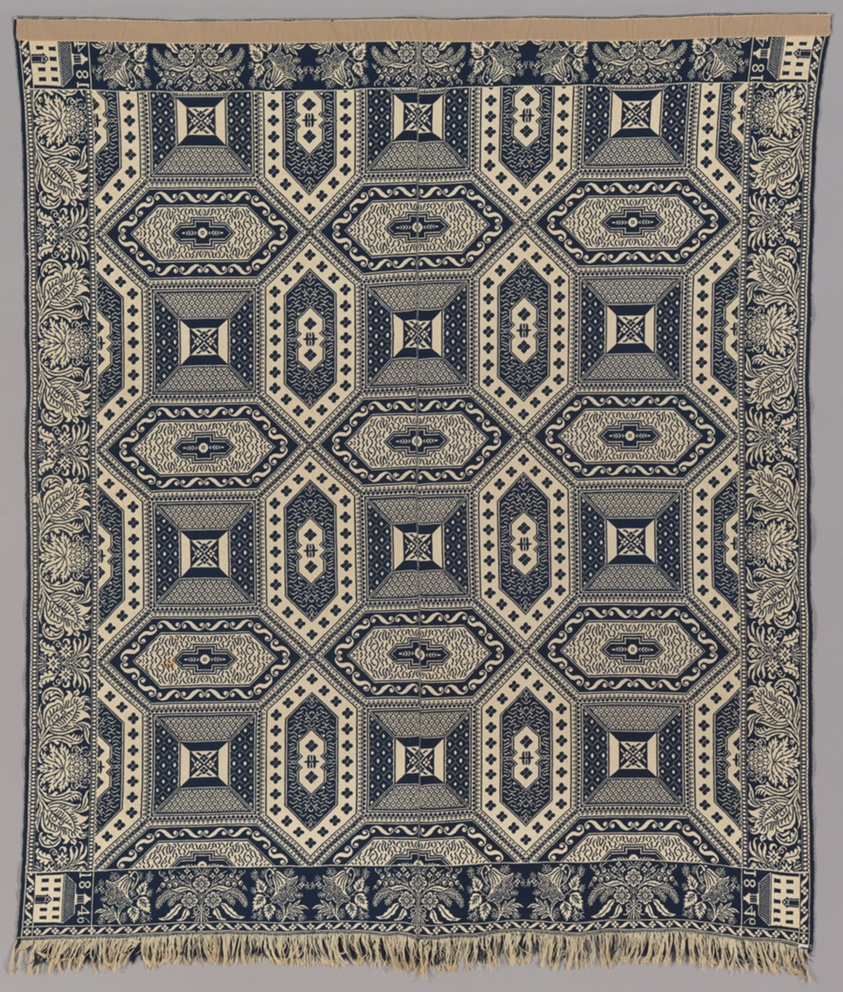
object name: Textile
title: Coverlet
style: 19th century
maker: William Craig, Sr. (American, 1800–1880); United States, Indiana, Decatur County, Greensburg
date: 1846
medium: Cotton and wool, plain weave double cloth; woven on loom with Jacquard attachment; main warp fringe; two loom widths joined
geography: Decatur County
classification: weaving - coverlet; coverlet; textile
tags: geometric, squares, triangles, scrolls (motifs), buildings, foliage, flowers, coverlet